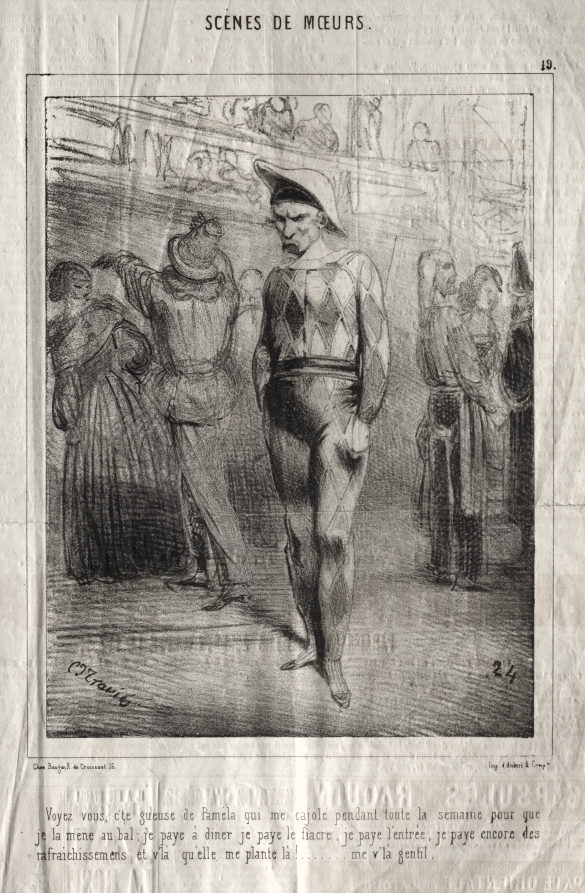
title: Scènes de moeurs: Voyez vous, c'te queuse de Pamela qui me cajole pendant toute la semaine pour que je la mene au bal...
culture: France, 19th century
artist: Charles Joseph Traviès de Villers (French, 1804–1859)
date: c. 1830–45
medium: lithograph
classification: Print